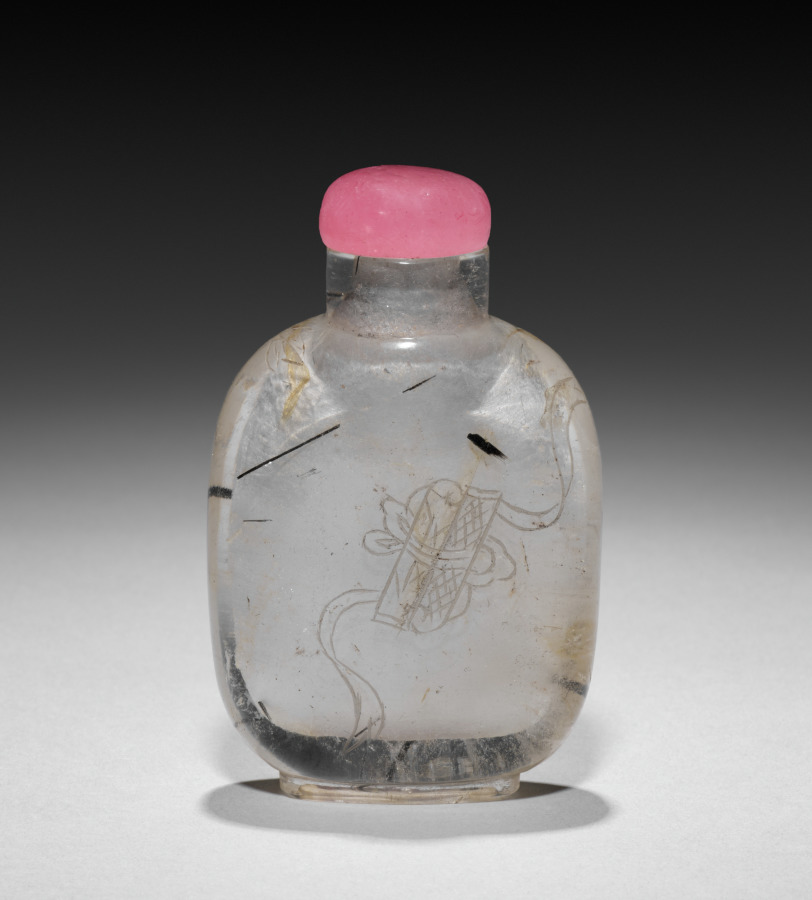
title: Snuff Bottle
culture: China, Qing dynasty (1644-1911)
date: 1644–1911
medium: glass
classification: Glass